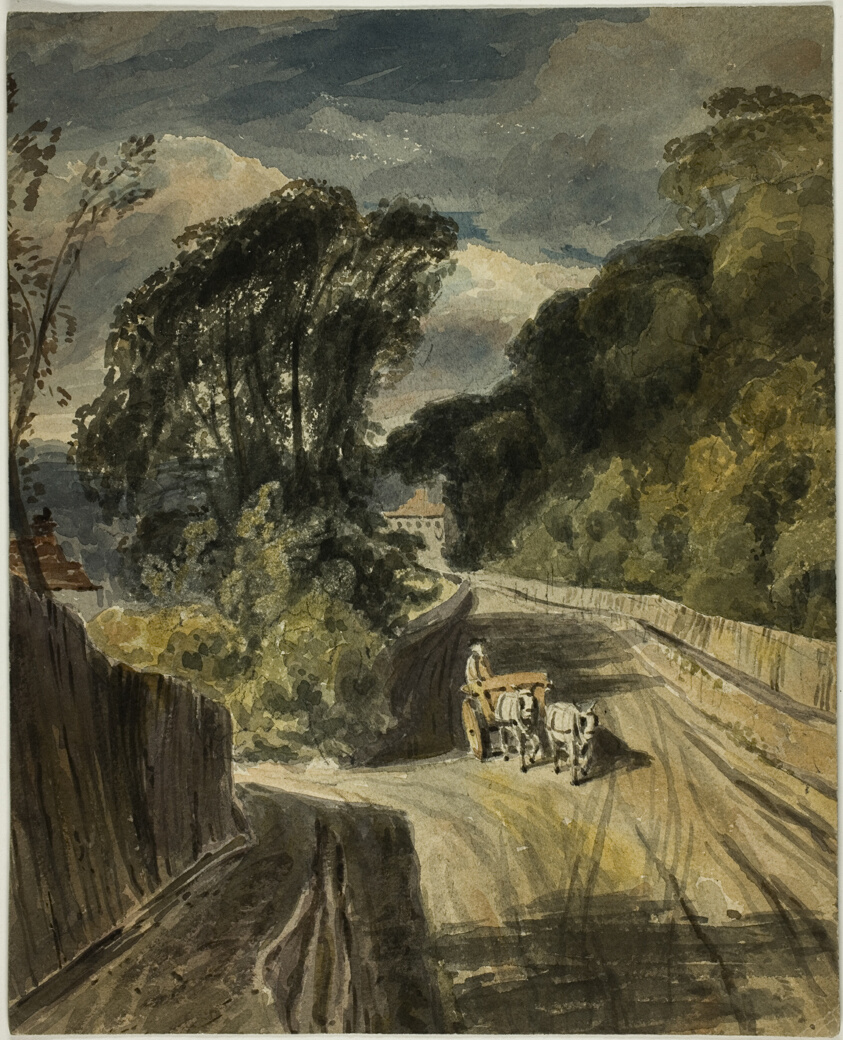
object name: Drawing and Watercolor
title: Two Horse Cart at Juncture in Road (recto); Park Landscape (verso)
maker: Unknown Artist (English 19th century); style of Peter De Wint (English, 1784-1849)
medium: Watercolor over graphite (recto), and watercolor with black chalk (verso), on ivory wove paper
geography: United Kingdom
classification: watercolor; drawings (visual works); prints and drawing